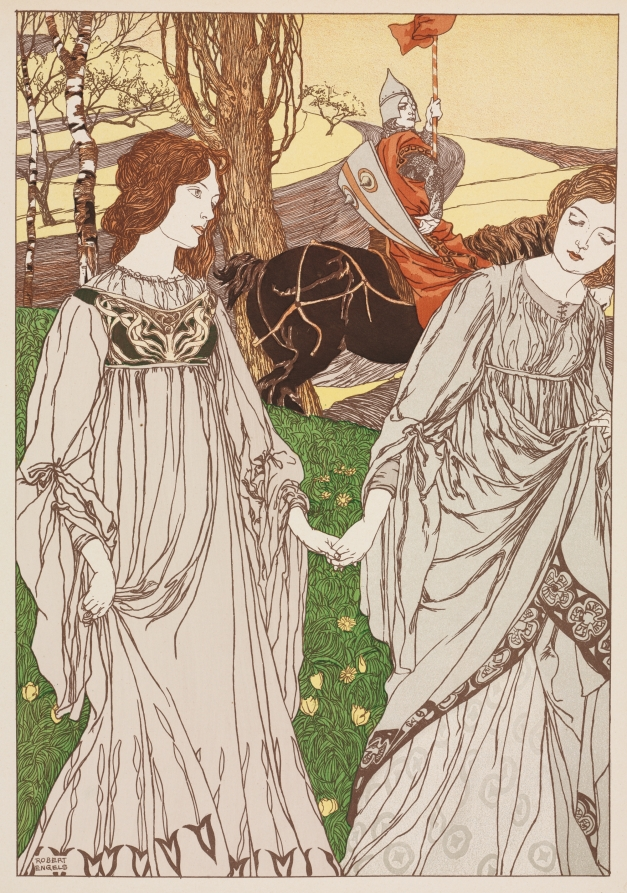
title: The Passer-By (Le Passant)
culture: England, 19th century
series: published in L'Estampe Moderne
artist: Robert Engels (British, 1855–1926)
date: 1897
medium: color lithograph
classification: Print